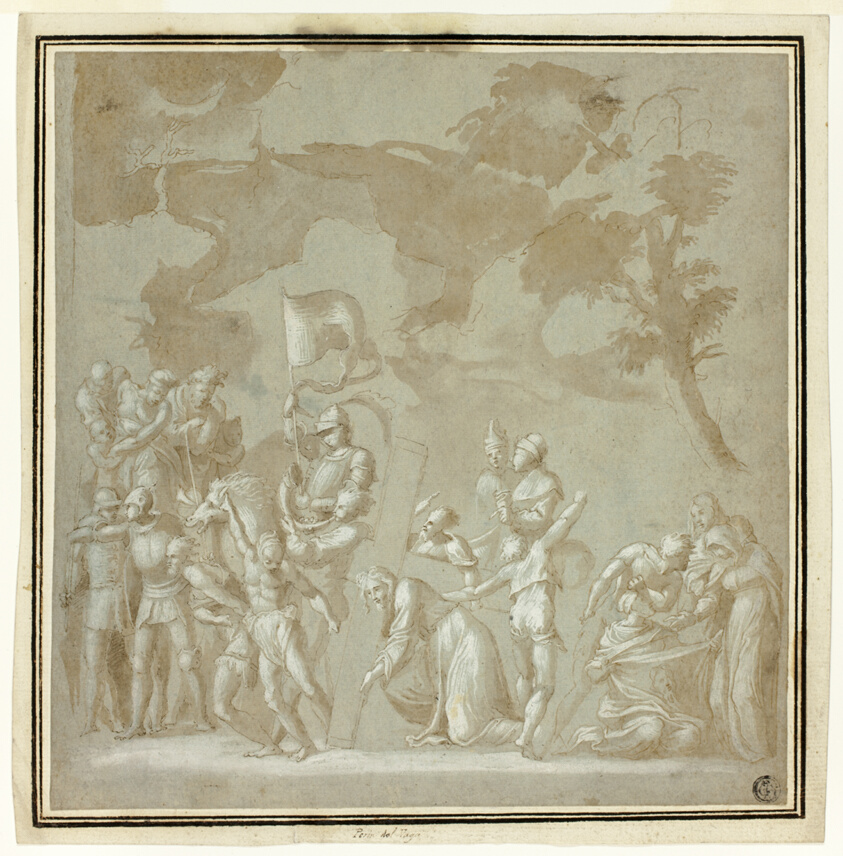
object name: Drawing and Watercolor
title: Calvary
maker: Attributed to Pedro Machuca; Spanish, c. 1495-1550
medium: Pen and brown ink and brush and brown wash, heightened with lead white, on blue (slightly faded) laid paper, laid down on ivory laid paper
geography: Spain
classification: ink with wash; drawings (visual works); prints and drawing